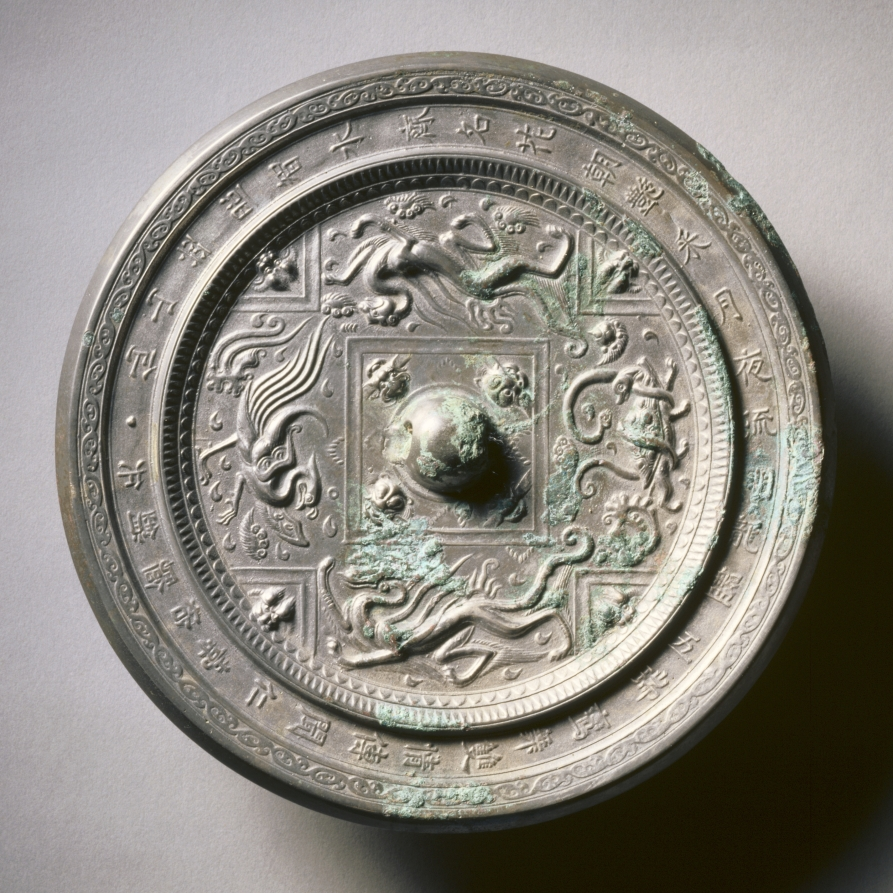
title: Mirror with Four Spirits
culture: China, Sui dynasty (581-618)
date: 581–618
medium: bronze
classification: Metalwork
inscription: The immortal peaks rise as twins./ The wise river now has a rival./ Morning flowers are made bright and charming./ At night, its light reflects the moon./ The dragon coils around the jade disc./ A pair of fabulous birds dance in harmony./ It is said the Renshou era/ Was when the war began to end.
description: Inscription: The immortal peaks rise as twins. The wise river now has a rival. Morning flowers are made bright and charming. At night, its light reflects the moon. The dragon coils around the jade disc. A pair of fabulous birds dance in harmony. It is said the Renshou era Was when the war began to end.